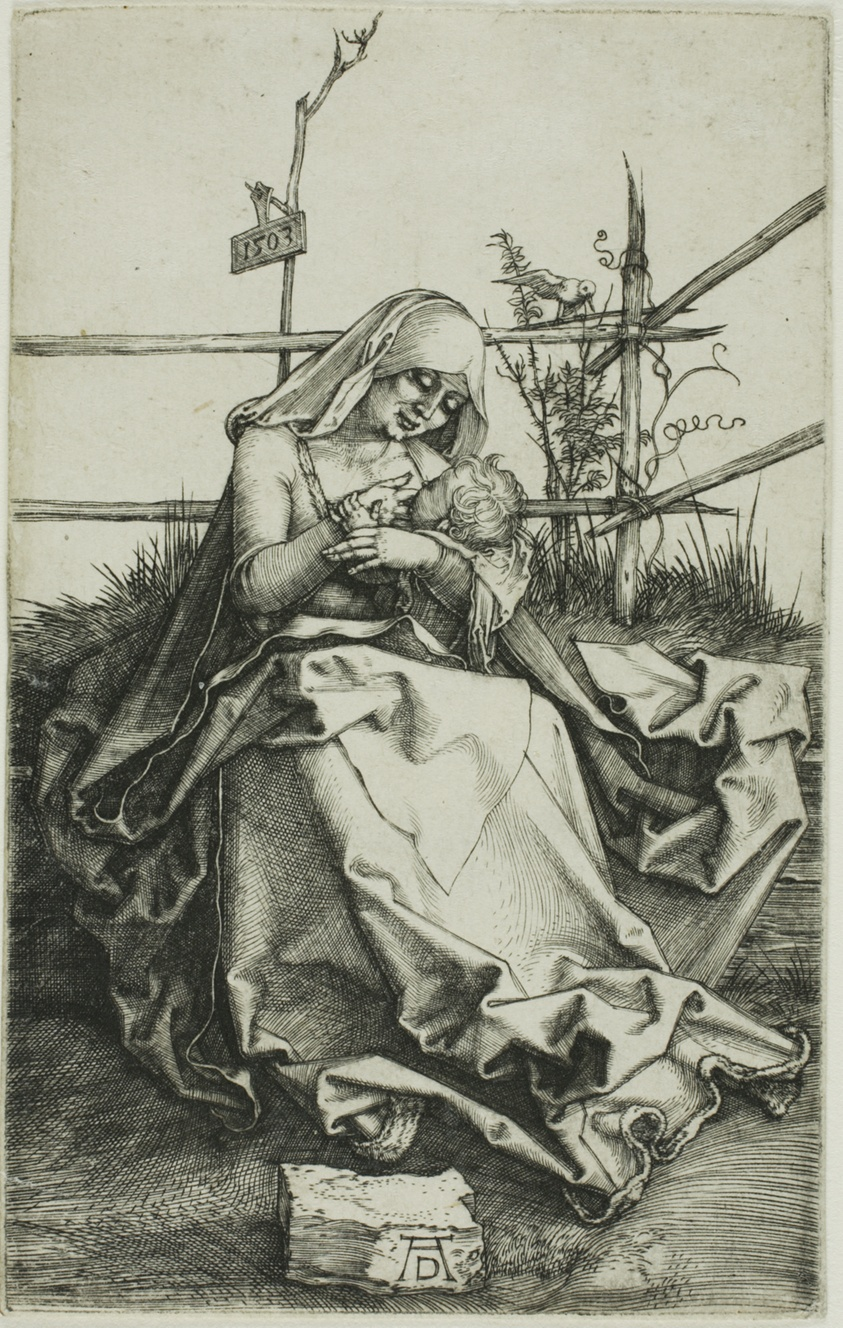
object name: Print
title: Madonna on a Grassy Bank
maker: Albrecht Dürer (German, 1471-1528)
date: 1503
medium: Engraving in black on ivory laid paper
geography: Germany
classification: engraving; print; prints and drawing; paper